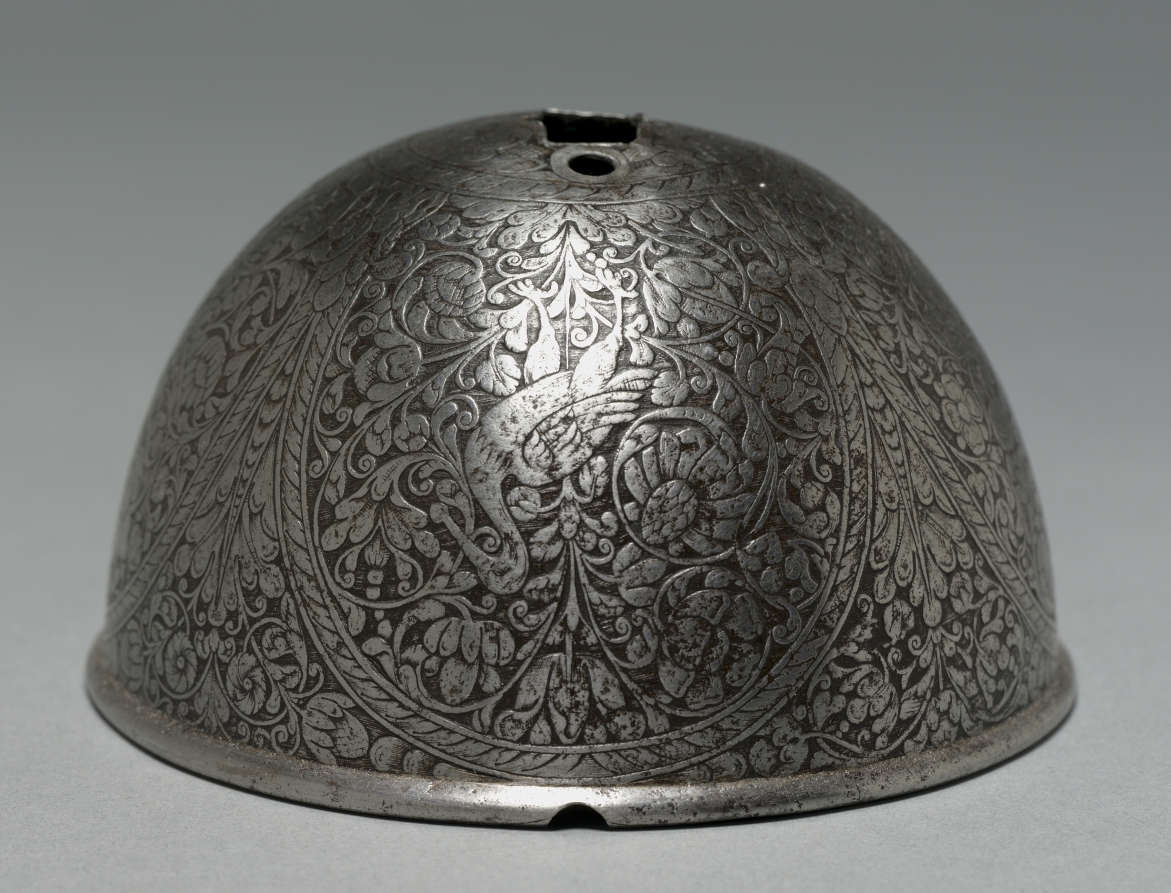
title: Cup from a Rapier's Hilt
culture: Italy, 17th century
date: c. 1650–75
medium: steel with etched floral, floiate, and bird designs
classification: Arms and Armor